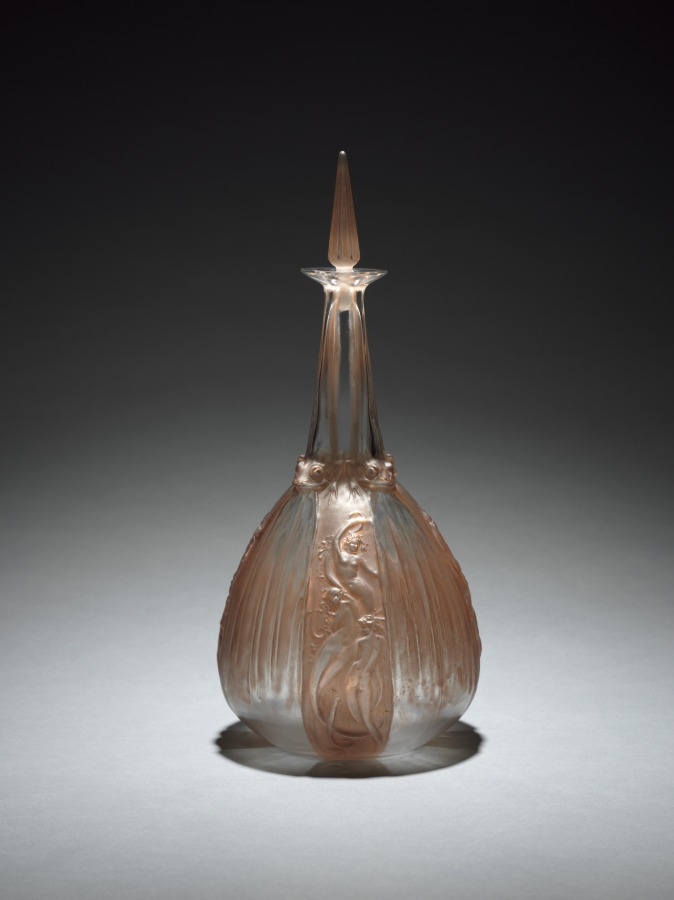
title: Mermaids and Frogs Decanter (Carafe sirènes et grenouilles)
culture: France, 20th century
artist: René Lalique (French, 1860–1945)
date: 1917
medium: glass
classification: Glass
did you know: The title of this work translates to mermaids and frogs carafe.